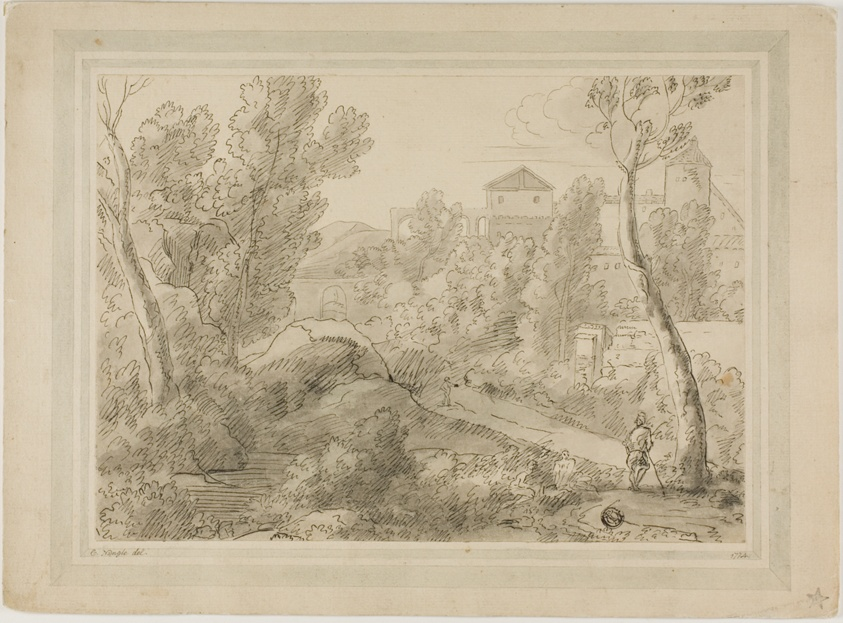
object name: Drawing and Watercolor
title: Italianate Landscape with Buildings, Aqueduct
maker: Unknown artist; possibly French, 18th century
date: c. 1774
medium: Pen and black ink, with brush and gray wash, on cream laid paper, laid down on cream laid card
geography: France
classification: pen and ink drawings; drawings (visual works); prints and drawing